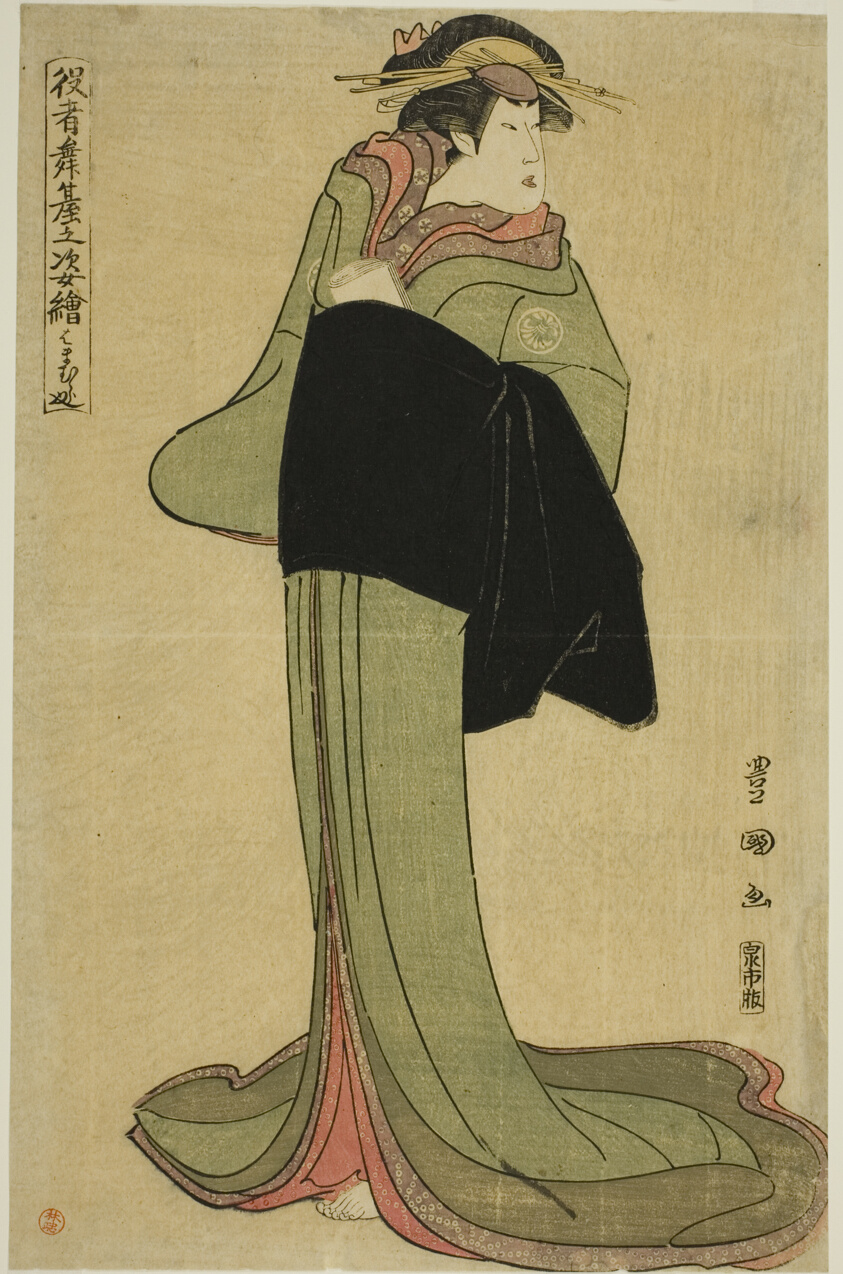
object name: Print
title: Hamamuraya: Segawa Kikunojo III as the courtesan Koman, from the series "Portraits of Actors on Stage (Yakusha butai no sugata-e)"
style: Japanese (culture or style)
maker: Utagawa Toyokuni I 初代 歌川 豊国; Japanese, 1769–1825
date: 1795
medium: Color woodblock print; oban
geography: Japan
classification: woodblock print; print; asian art